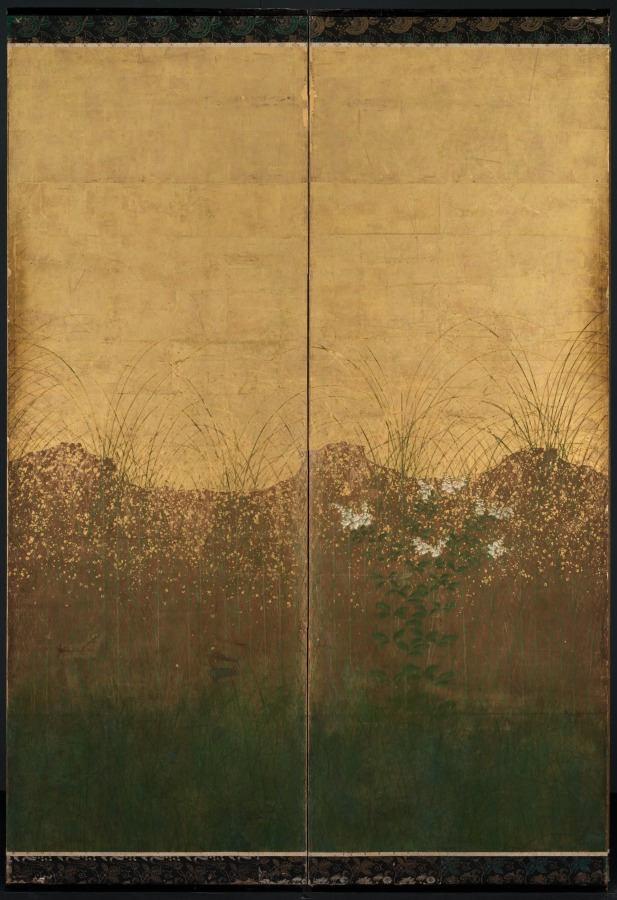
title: Autumn Evening with Full Moon on Musashino Plain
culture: Japan, Edo period (1615–1868)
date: early 1600s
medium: One of a pair of six-fold screens; ink, color, and gold and silver foil on gilded paper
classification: Painting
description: Tall grasses and autumn flowers reach out of thick green undergrowth in this depiction of the plain of Musashi, a site famous from classical Japanese poetry. A silver disc, now tarnished, represents the full moon. Flecks of cut-gold foil in the sky evoke the day’s passage into night. Once a wilderness with a vast horizon, Musashi is now densely populated.